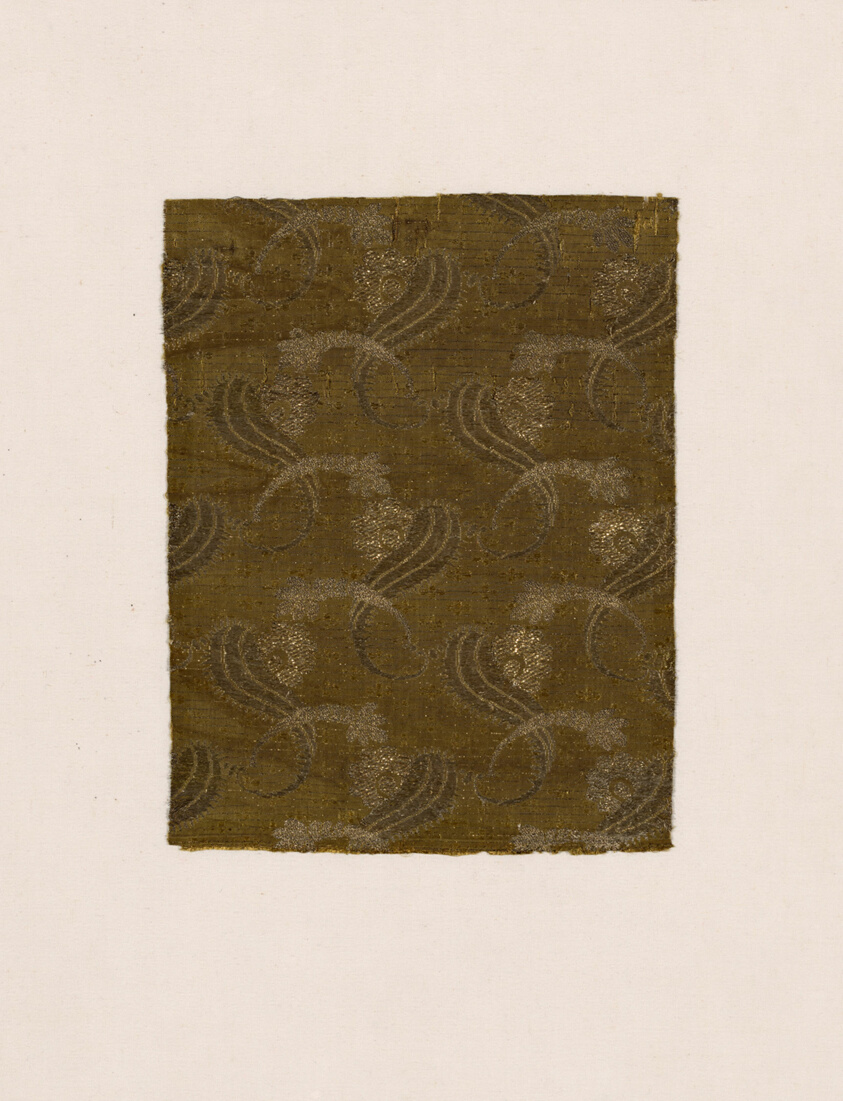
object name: Textile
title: Fragment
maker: Italy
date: c. 1700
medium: Silk, gilt-metal strip, gilt-metal-strip-wrapped silk, warp-faced, weft-ribbed plain weave with supplementary patterning, brocading and facing wefts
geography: Italy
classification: textile; weaving